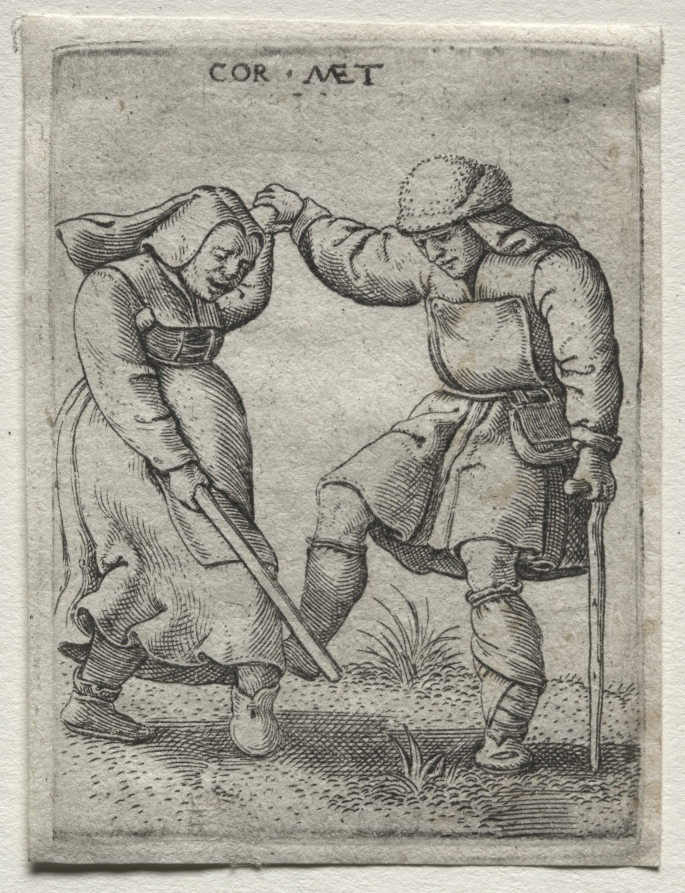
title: Dancing Cripples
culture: Flanders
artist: Cornelis Massys (Flemish, 1510/11–1556/57)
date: 1538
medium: engraving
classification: Print